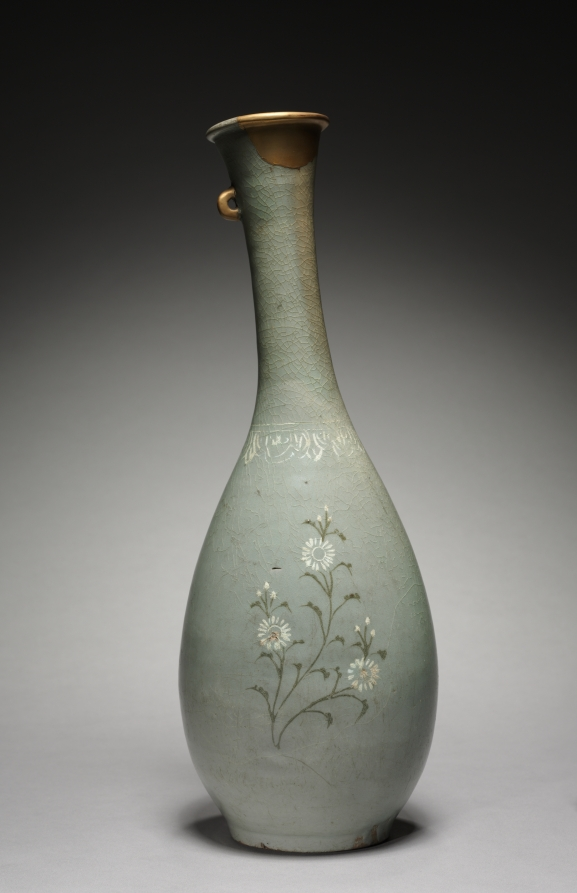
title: Bottle with Chrysanthemum Design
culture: Korea, Goryeo dynasty (918–1392)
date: 1200s-1300s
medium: Celadon ware with inlaid white and black slip decoration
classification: Ceramic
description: This rare long-neck celadon wine bottle is inlaid with white wild chrysanthemums, symbols of both the poem "Drinking Wine" and blessings of longevity. One root has three stems with tiny white blossoms. The damaged lip was repaired with gold lacquer. Korean Celadons Repaired with Gold Termed kintsugi (literally meaning “gold joinery”) in Japanese, this method of repair highlights broken parts with glittering gold mixed with lacquer. Initiated in 15th-century Japan, the technique follows a popular aesthetic concept called wabi-sabi, which finds beauty in imperfect things and continued to be practiced throughout the modern period in East Asia. Goryeo celadons were considered extremely rare treasures among modern collectors; thus, the broken condition of these examples is brilliantly highlighted in gold lacquer on the repaired spouts, handle, and lid.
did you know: Termed kintsugi (literally meaning “gold joinery”) in Japanese, this method of repairing broken parts with glittering gold mixed with lacquer was extensively used for ceramic works in the Goryeo period, such as this one.